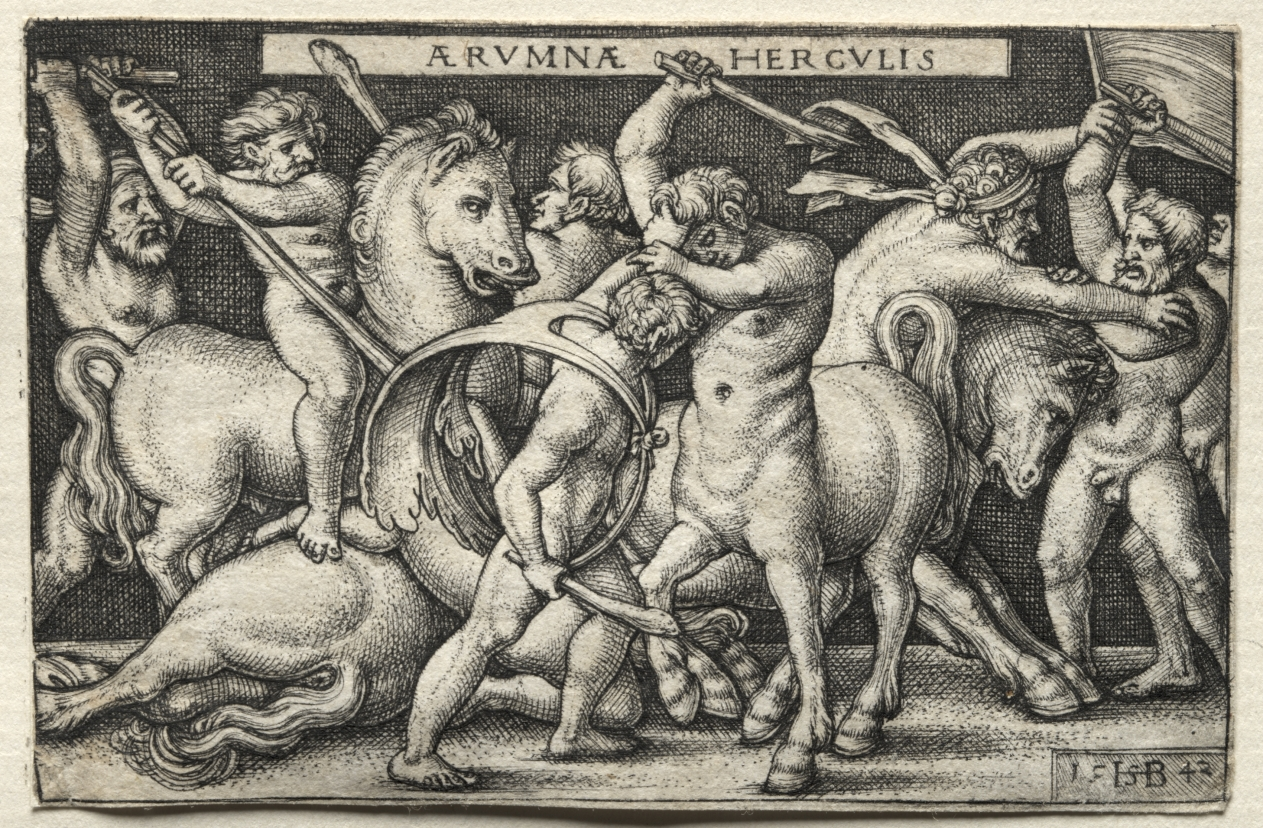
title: The Labors of Hercules: Hercules Defeating the Centaurs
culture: Germany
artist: Hans Sebald Beham (German, 1500–1550)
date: 1542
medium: engraving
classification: Print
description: Labeled ARUMNAE HERCVLIS, meaning “Labors of Hercules,” this is the title page of Beham’s suite of 12 tiny prints depicting larger-than-life stories of the mighty Hercules. The battle scene may refer to a story in which Hercules slays the centaur Eurytion, bridegroom to a young girl who was previously Hercules’s lover. The centaur could also allude to Nessus, a centaur who cunningly plots Hercules’s undoing, depicted later in the series. Beham was one of several German printmakers referred to today as the “Little Masters.” They established their artistic prowess by engraving remarkably small prints, appealing to collectors fascinated with miniature objects and curiosities.